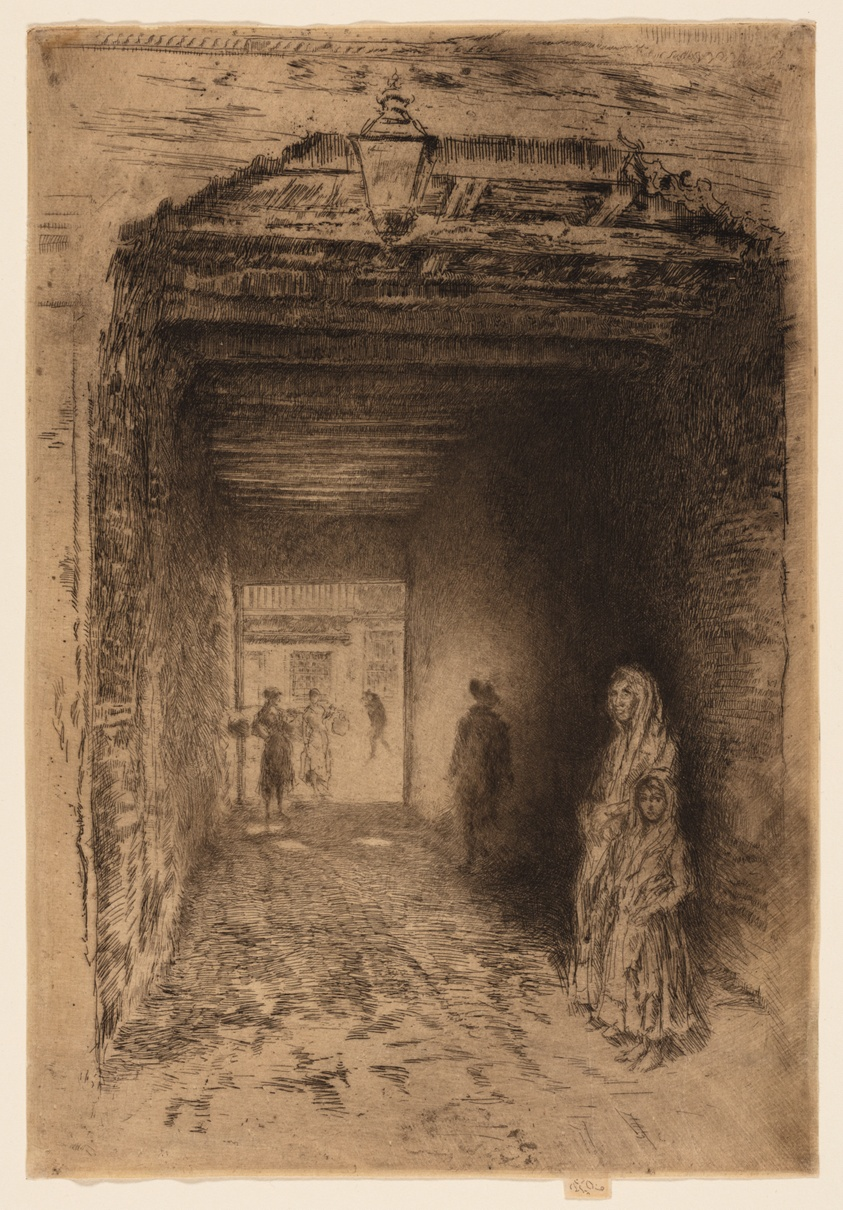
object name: Print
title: The Beggars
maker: James McNeill Whistler (American, 1834-1903)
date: 1879/80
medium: Etching and drypoint with foul biting in dark brown ink on ivory laid paper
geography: United States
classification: etching; foul biting; print; prints and drawing; drypoint; paper